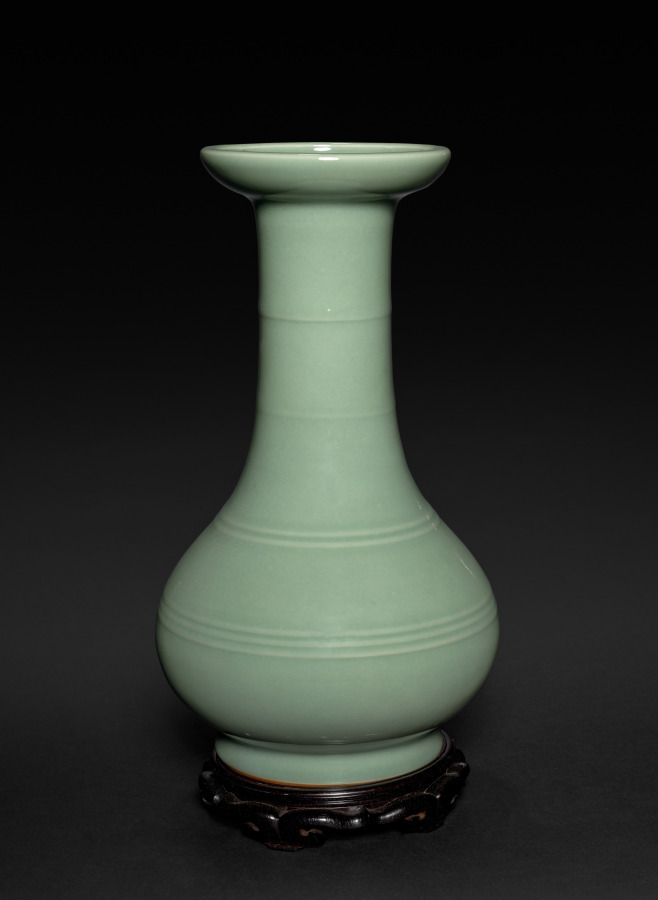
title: Vase with Bamboo Joints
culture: Japan, Taishō period (1912–26)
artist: Seifū Yohei IV (Japanese, 1872–1951)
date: 1914–46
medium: Porcelain with green glaze and molded design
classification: Ceramic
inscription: 清風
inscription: 清風造【印】清風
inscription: 成山清風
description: Yohei IV’s Vase with Bamboo Joints has a shape often seen in pairs of bronze flower vases placed to either side of Buddhist altars before sculptural icons. While the term hisoku (Chinese mise 秘色), or “mysterious color” glazing, indicates a more specific green color than seiji 青磁, a more general word for green-glazed porcelain, there is still some range in the actual color of the glaze.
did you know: Many ceramics created by the Seifū Studio refer to and emulate Chinese ceramics in form and glazing.